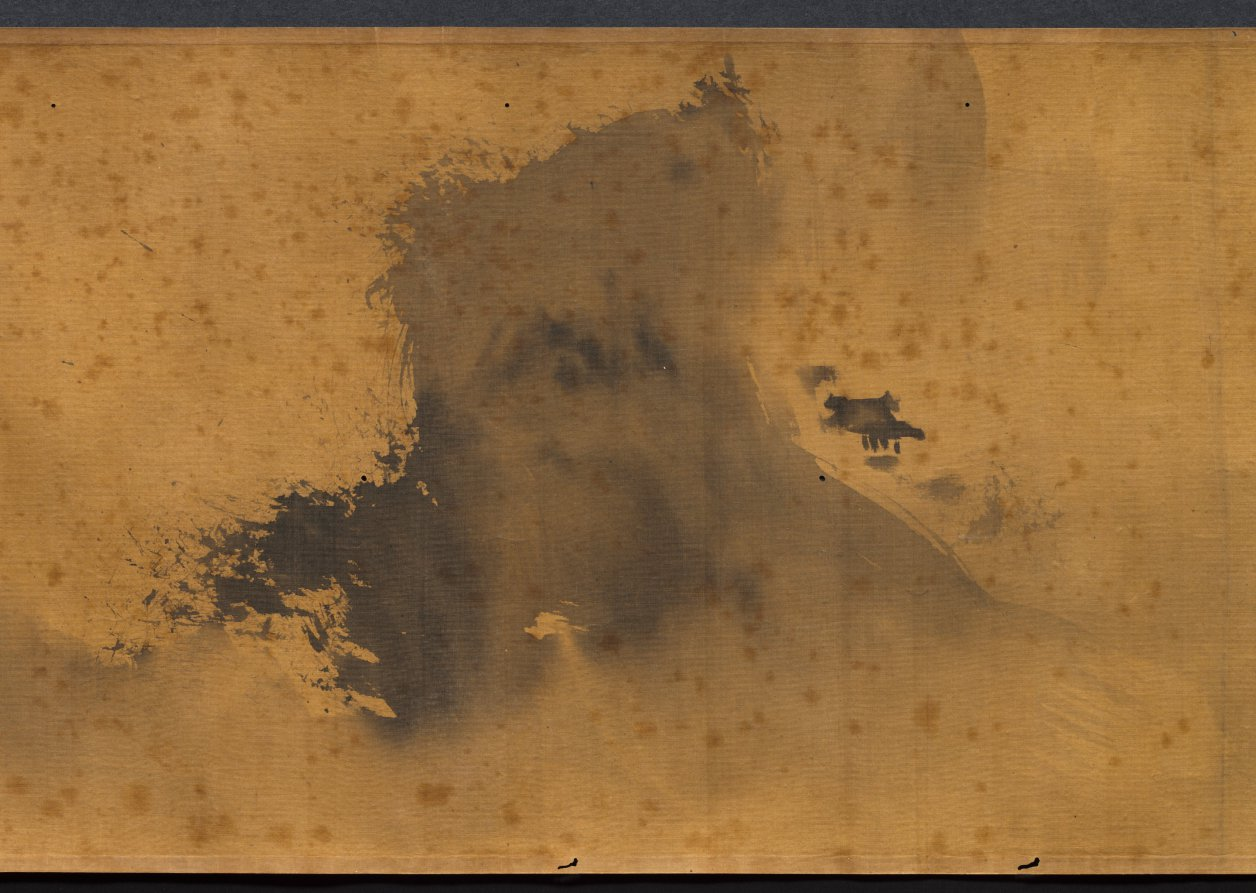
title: Eight Views of Xiao-Xiang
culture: Japan, Edo period (1615–1868)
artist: Kano Tan’yū (Japanese, 1602–1674)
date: 1615–1868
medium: handscroll; ink on silk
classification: Painting